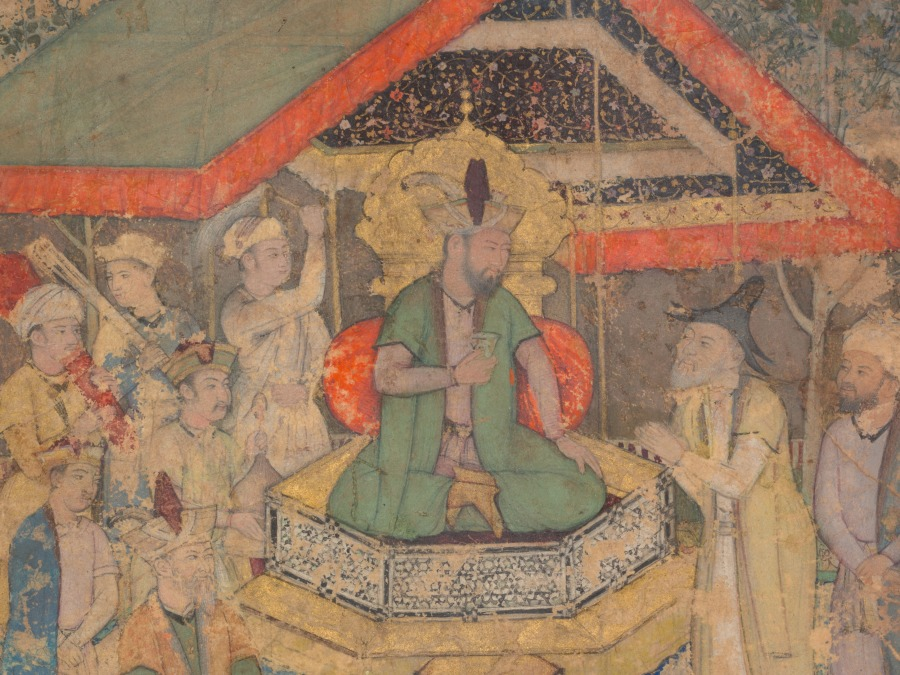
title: An Ambassador before Humayun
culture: Mughal India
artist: attributed to Miskin (Indian, active 1570s–c. 1604)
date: c. 1610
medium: Gum tempera and gold on paper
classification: Painting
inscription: Persian inscription at upper left probably added c. 1700s, in nasta‘liq script: the work of the master Miskin / Great King Hasan . . .]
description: Humayun, the second Mughal emperor of India, son of Babur and father of Akbar, is enthroned in an outdoor royal encampment. The scene recalls Humayun’s 15 years of exile between 1540 and 1555, many of which he spent traveling through Pakistan, Afghanistan, and Iran, after an Afghan rebel ousted him from India.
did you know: Humayun wore a special type of turban, his Taj-i Izzat (Crown of Power and Glory).